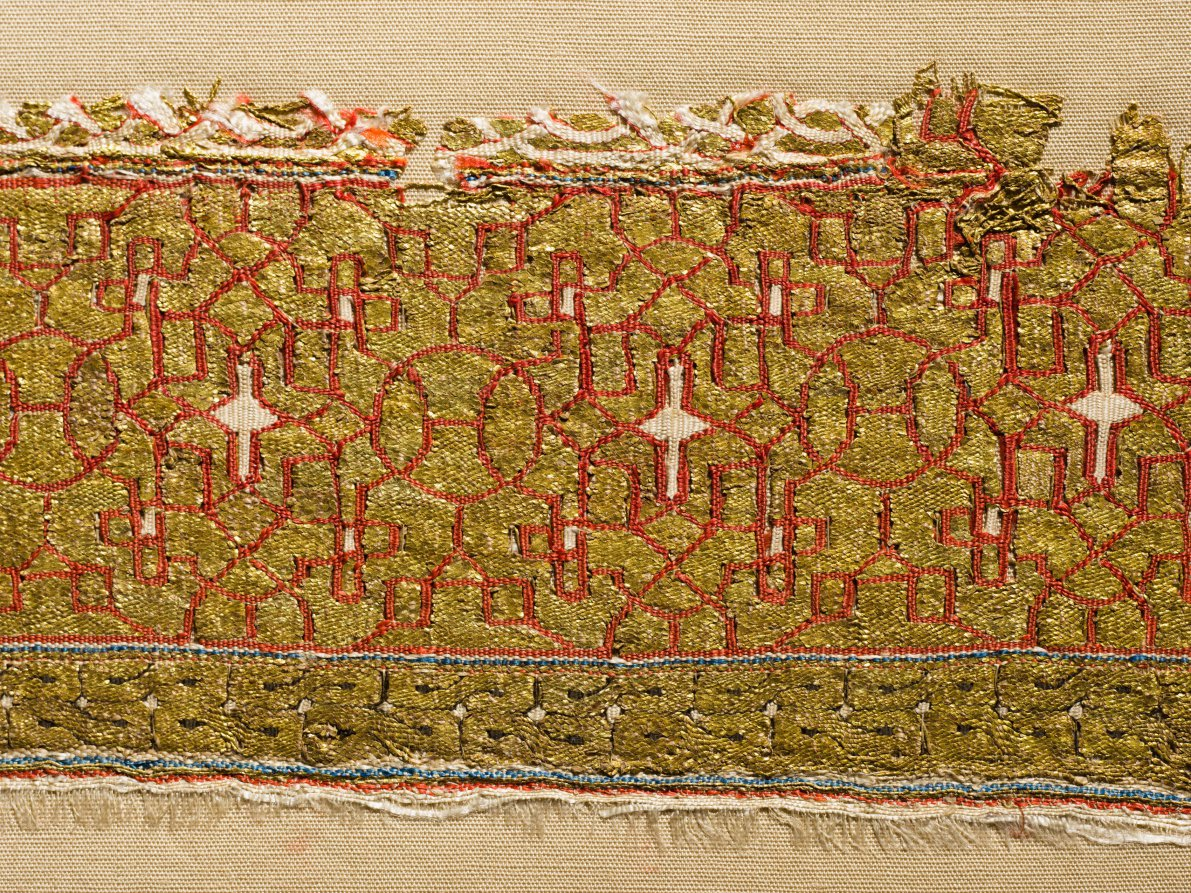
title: Guilloche band, from a dalmatic of San Valero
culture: Spain, probably Almeria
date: 1200s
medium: tapestry weave: silk and gold thread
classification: Textile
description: Rarely do medieval silks convey their original luxurious quality with such brilliant gold thread. This fragment is said to have been among relics of Saint Valerio from Lérida Cathedral (in northeast Spain, near Barcelona). An elegant geometric tracery in crimson silk decorates the gold-thread ground, bordered above by four interlacing strands in ivory silk and below by two rows of "figure 8s" woven with gold thread and black silk outlines.